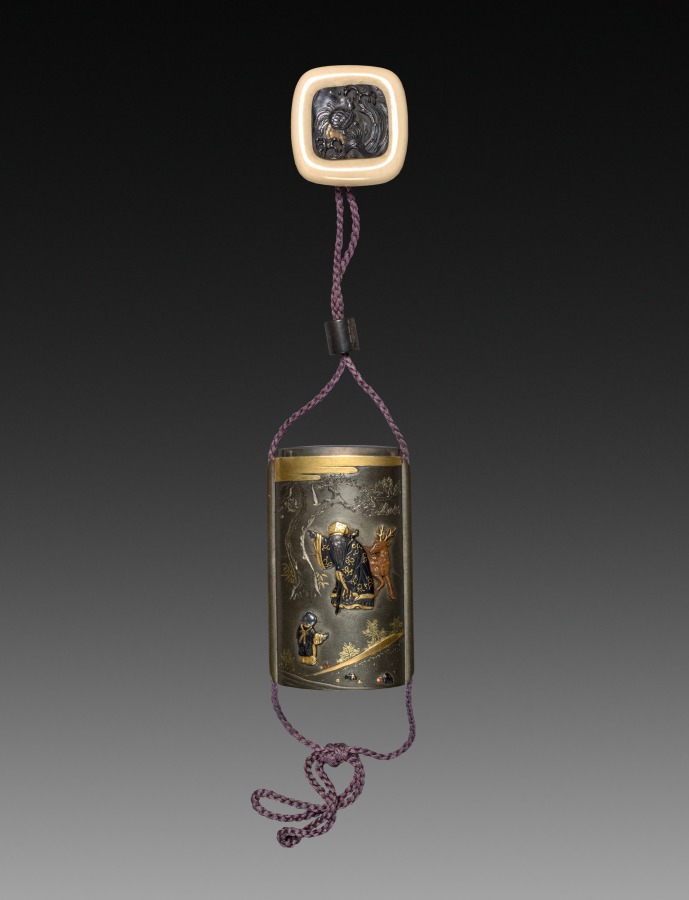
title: Inro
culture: Japan, Edo period (1615–1868)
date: early 1800s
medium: lacquer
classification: Lacquer